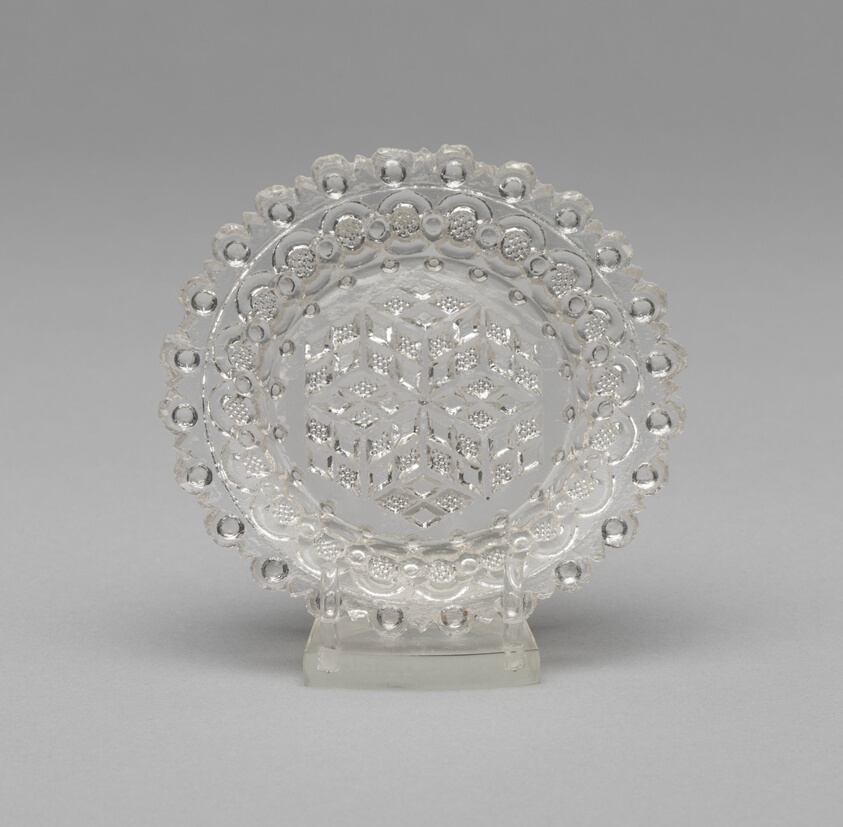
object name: Glass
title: Cup plate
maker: Artist unknown (American, 19th century); Probably Pittsburgh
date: 1830–35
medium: Pressed glass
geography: Pittsburgh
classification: plate (general, dish); glass; american decorative arts; american arts; decorative arts